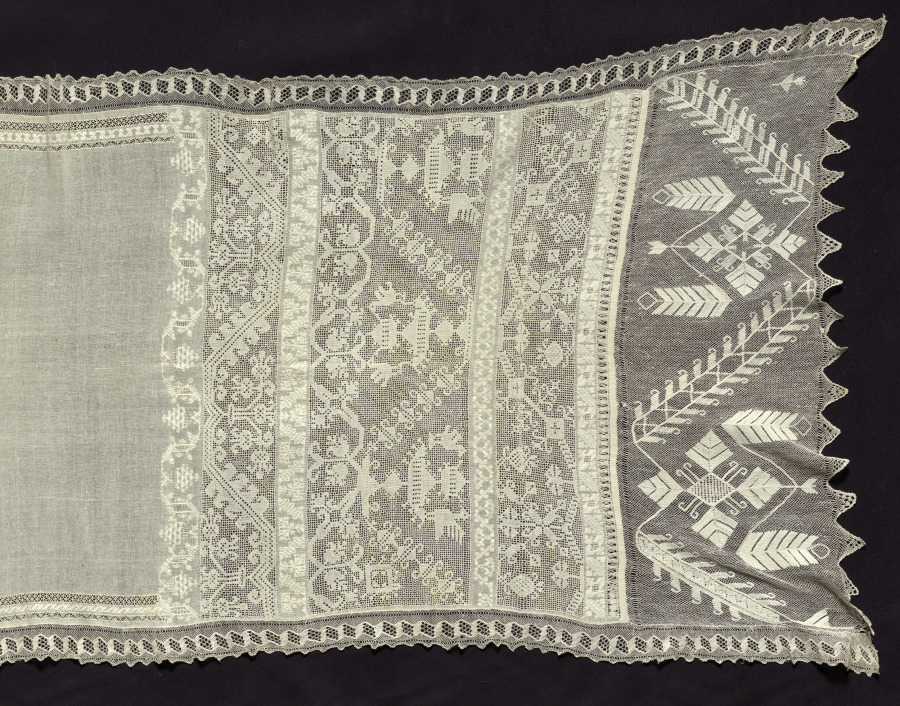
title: Cloth with Border of Vegetal Motifs and Insertion with Bird Motifs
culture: Cyprus ?, 1700s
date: 1700s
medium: Plain weave wool with needle lace, burato insertion (twined ground and darned in two directions), filet/lacis border and edging (knotted ground and darned in one direction), drawn work, and embroidery; bleached linen (est.), wool (est.), and cotton (est.)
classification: Lace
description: Textiles often incorporate multiple needlework techniques within a single piece. One of the techniques in this example of lace is called cutwork. In cutwork, portions of the textile ground, such as a linen or cotton cloth, are cut away and threads are removed to create holes. The edges of the hole are then reinforced with embroidery and a pattern of needle lace can be created within the perimeter. Rather than adding to the cloth to create a design, the craftsperson removes threads to fabricate a pattern.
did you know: This lace was given to the museum by Louise Tifft Brown, a native Clevelander who became an expert in lace while living in Venice for 35 years.